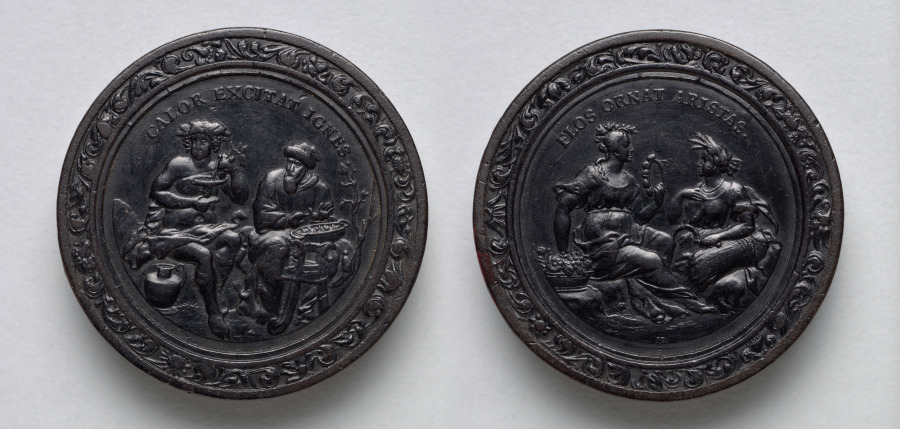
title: Gaming Piece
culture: Germany, late 17th-early 18th Century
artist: Martin Brunner (German, 1659–1725)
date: c.1700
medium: wood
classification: Furniture and woodwork